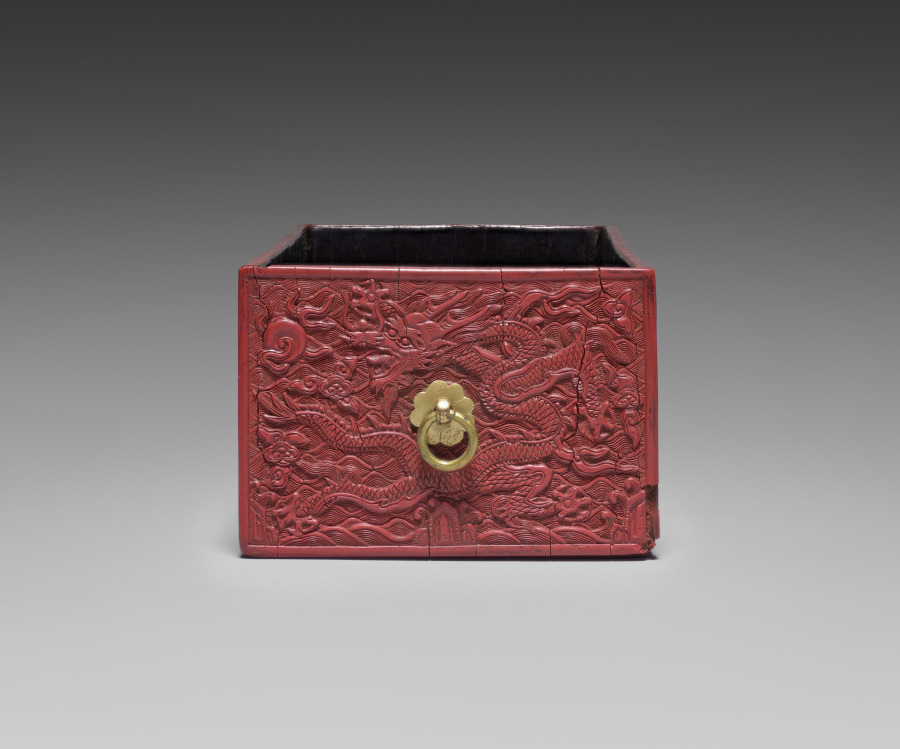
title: Drawer for a Tihong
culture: China, Ming dynasty (1368-1644), Wanli reign (1572-1620)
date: 1585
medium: carved cinnabar lacquer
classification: Lacquer